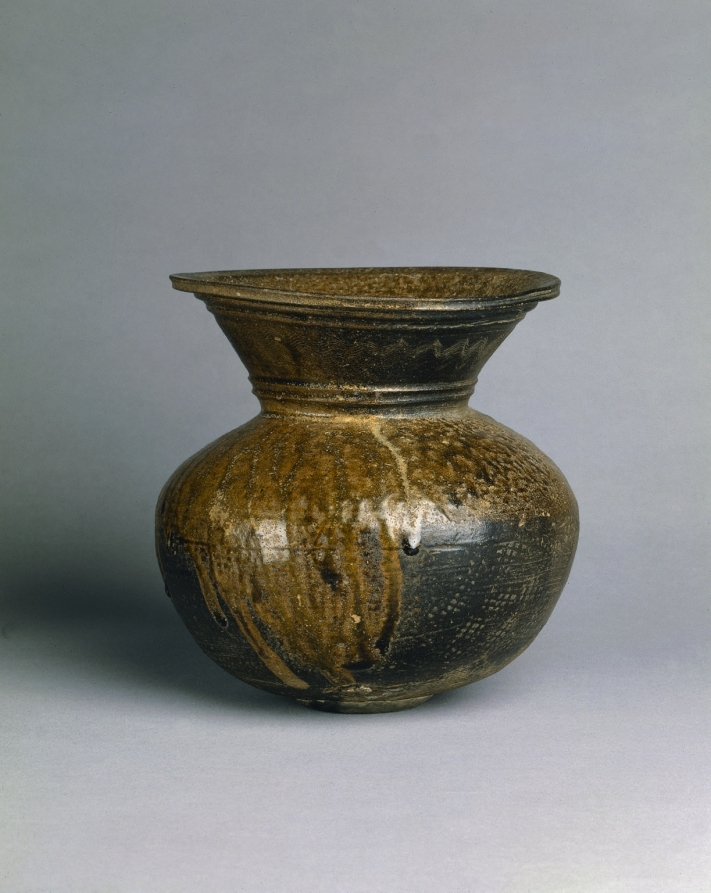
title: Jar with Combed Design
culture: Japan, Kofun period (300–710 CE)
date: 400s–500s CE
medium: stoneware with natural ash glaze, impressed and tooled patterns (Sue ware)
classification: Ceramic